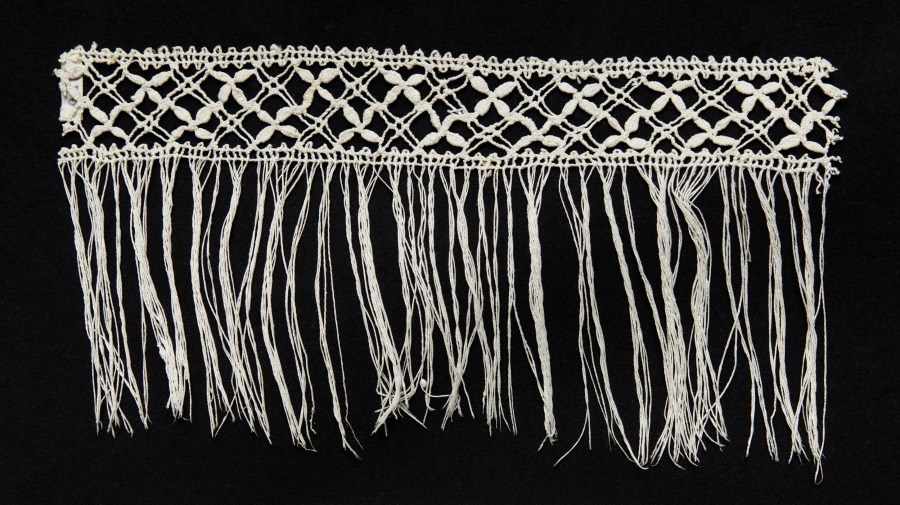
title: Lace Insertion with Fringe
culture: Italy, Genoa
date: 1550–99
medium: Linen: bobbin lace (needle lace, reticella design)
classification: Lace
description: Although this fringed bobbin lace fragment is made of linen, its format is like those for laces made of gold, silver, and colored silk threads.